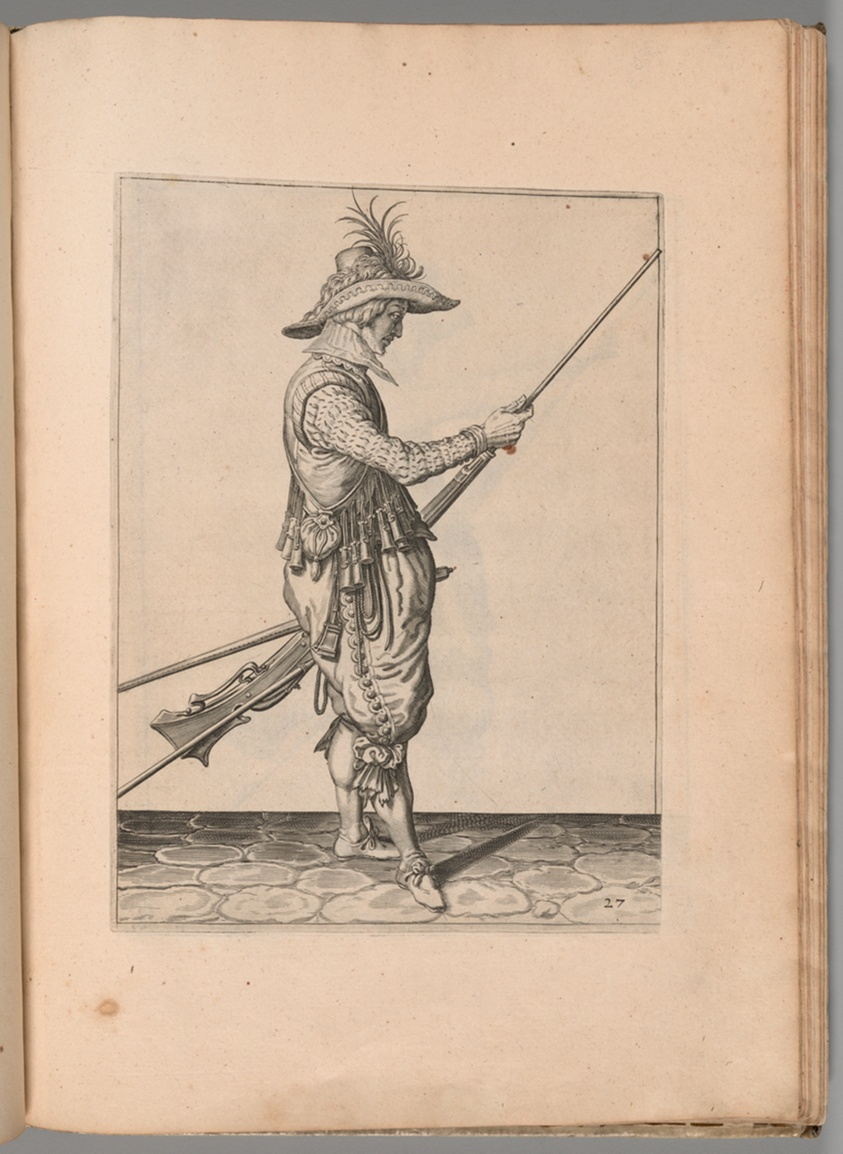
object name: Book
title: Exercise of Arms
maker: Jacob de Gheyn, II (Dutch, 1565-1629)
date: 1608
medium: Illustrated book featuring 117 copper plate engravings on ivory laid paper; full vellum binding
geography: Netherlands